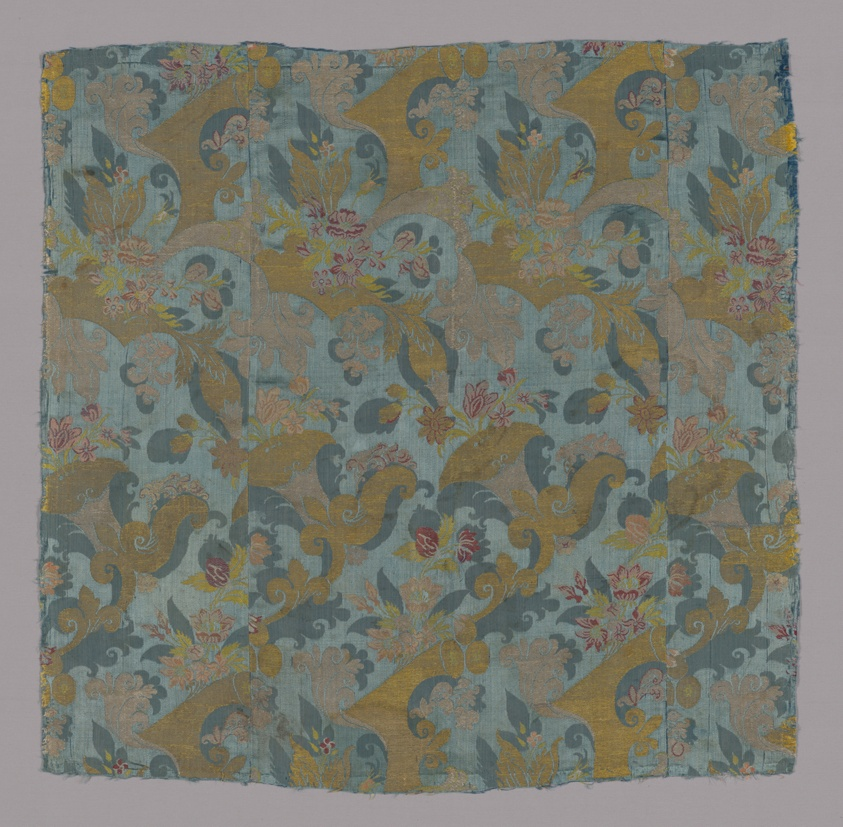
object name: Textile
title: Panel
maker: France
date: c. 1710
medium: Silk, gilt-and-silvered-metal-strip-wrapped silk, warp-float faced 7:1 satin weave with supplementary brocading wefts bound in weft-float faced 3:1 twill interlacings and self-patterned by areas of plain weave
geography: France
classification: textile; weaving